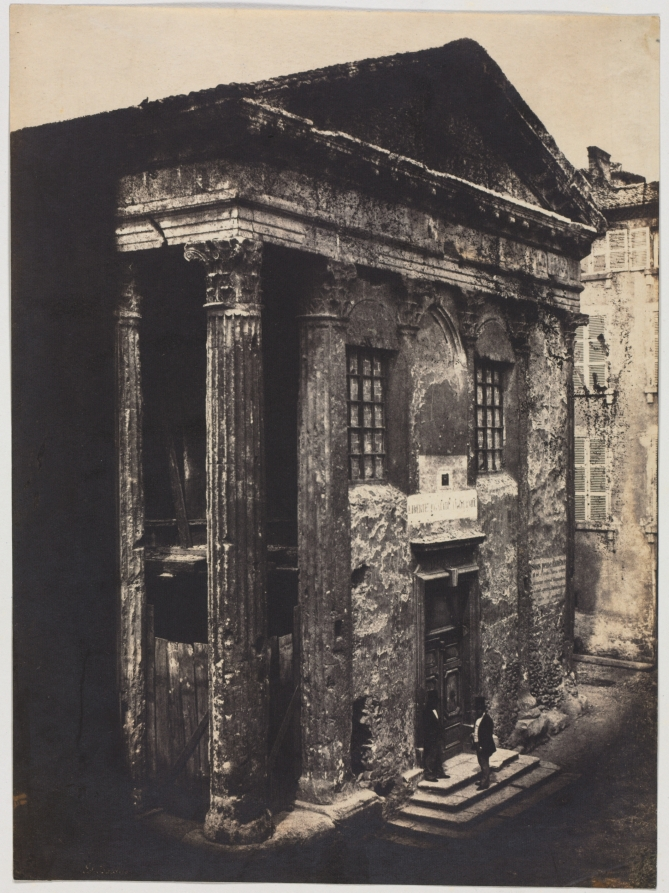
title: Façade, Temple of Augustus and Livia, Vienne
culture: France, 19th century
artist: Édouard Baldus (French, 1813–1889)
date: 1851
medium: salted paper print from a gelatin paper negative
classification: Photograph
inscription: Imprinted into the image, in script at the bottom left corner: "Ed Baldus".